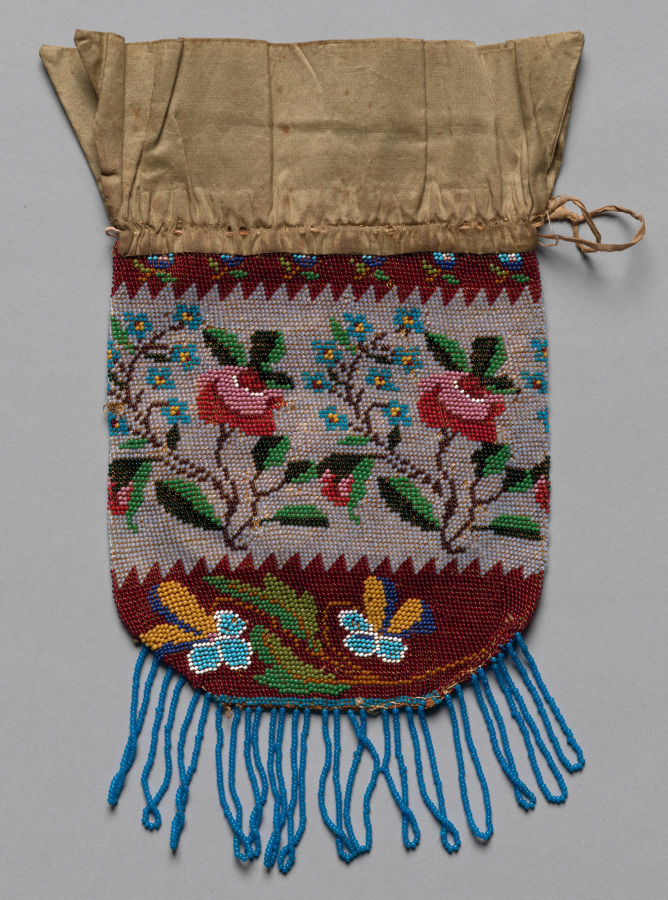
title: Beaded Bag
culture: America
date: 19th century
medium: beads and silk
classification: Garment